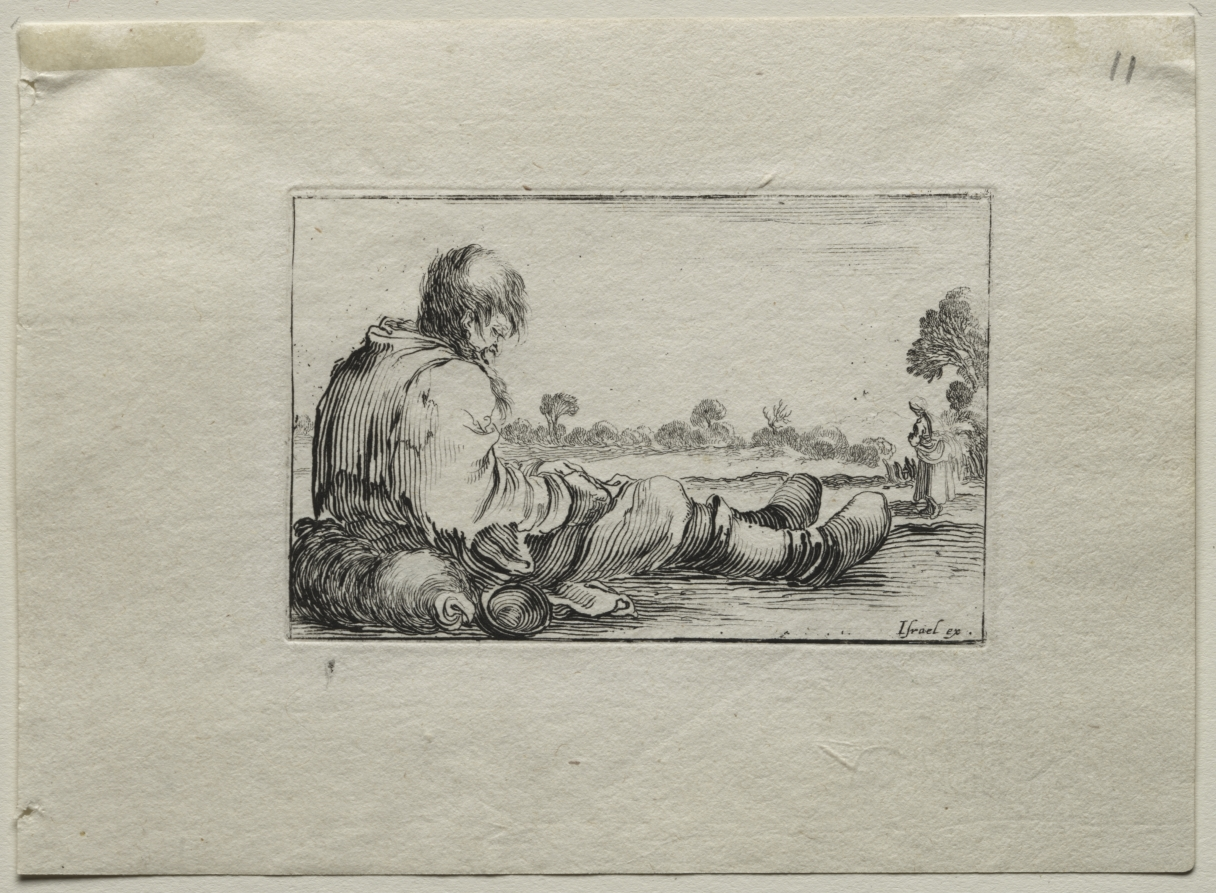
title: Caprices: Seated Beggar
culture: Italy, 17th century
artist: Stefano Della Bella (Italian, 1610–1664)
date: c. 1642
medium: etching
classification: Print